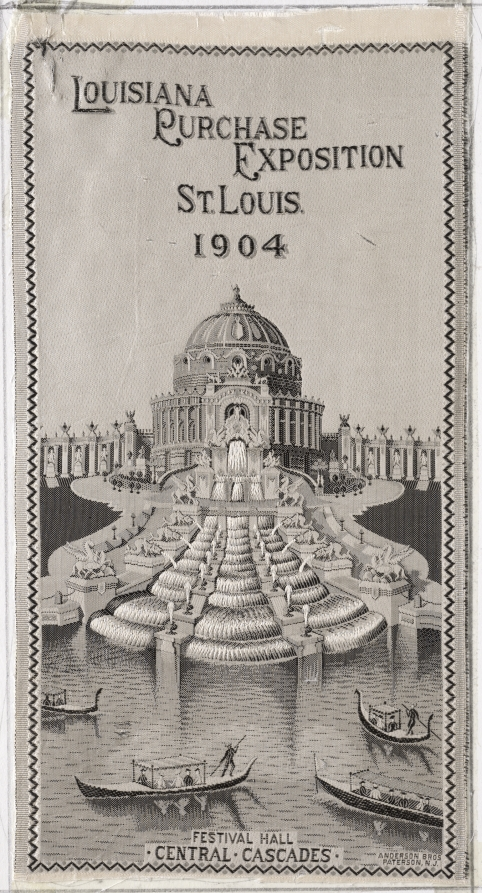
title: Louisiana Purchase Exposition St. Louis 1904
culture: England (?), Early 20th century (?)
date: c. 1900–1925 (?)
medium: jacquard weave; silk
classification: Textile